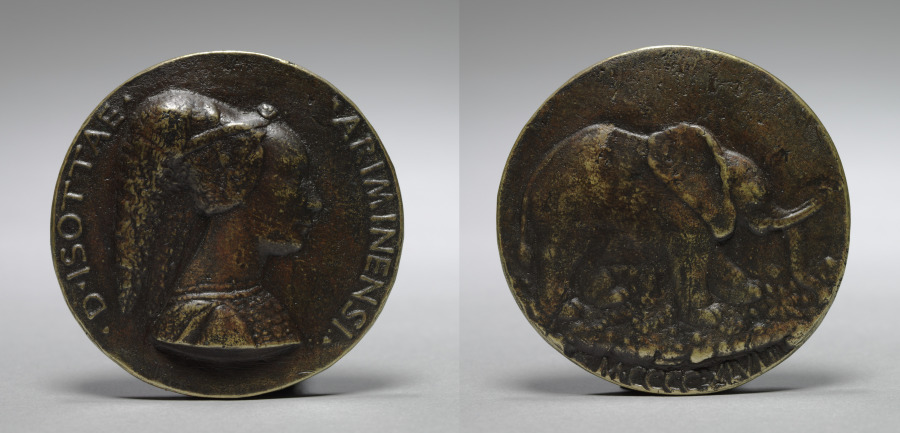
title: Medal of Isotta degli Atti da Rimini (obverse) and (reverse)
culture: Italy, 15th century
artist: Matteo de' Pasti (Italian, 1420–1467/68)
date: 15th century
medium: bronze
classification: Sculpture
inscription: obverse: "D ISOTTAE ARIMINENSI"